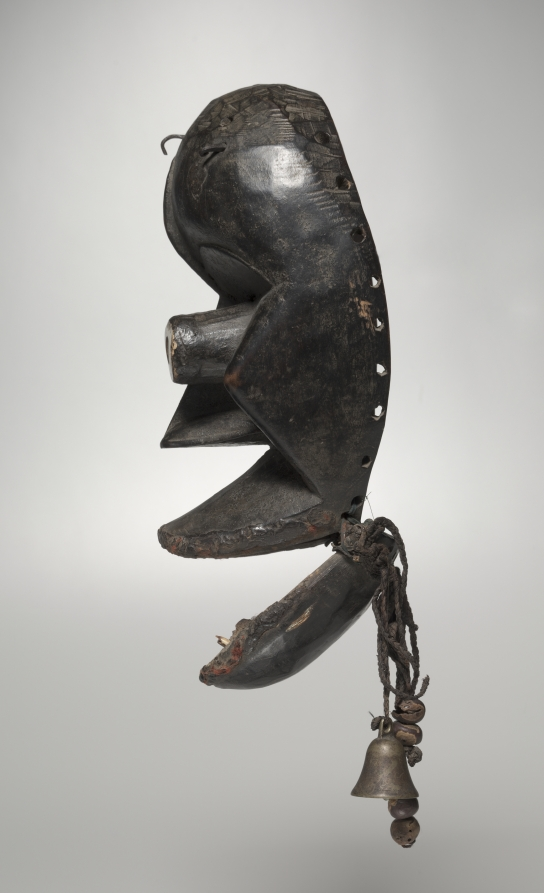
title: Mask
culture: Africa, West Africa, Liberia, Mano-style carver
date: early 1900s, before 1933–37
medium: Wood, copper alloy, plant fiber, cloth, rawhide or leather, teeth, seeds, resin, synthetic material, iron, and glass beads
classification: Mask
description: Generally, Mano masks are considered to be manifestations of forest spirits and can be grouped into 11 major types relating to aspects of social control, political and judicial matters, peacemaking, education, competition, and entertainment. This mask was acquired in Liberia by the medical missionary George Harley between 1933 and 1937.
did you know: The jaw of this mask is hinged, allowing it to open and close.